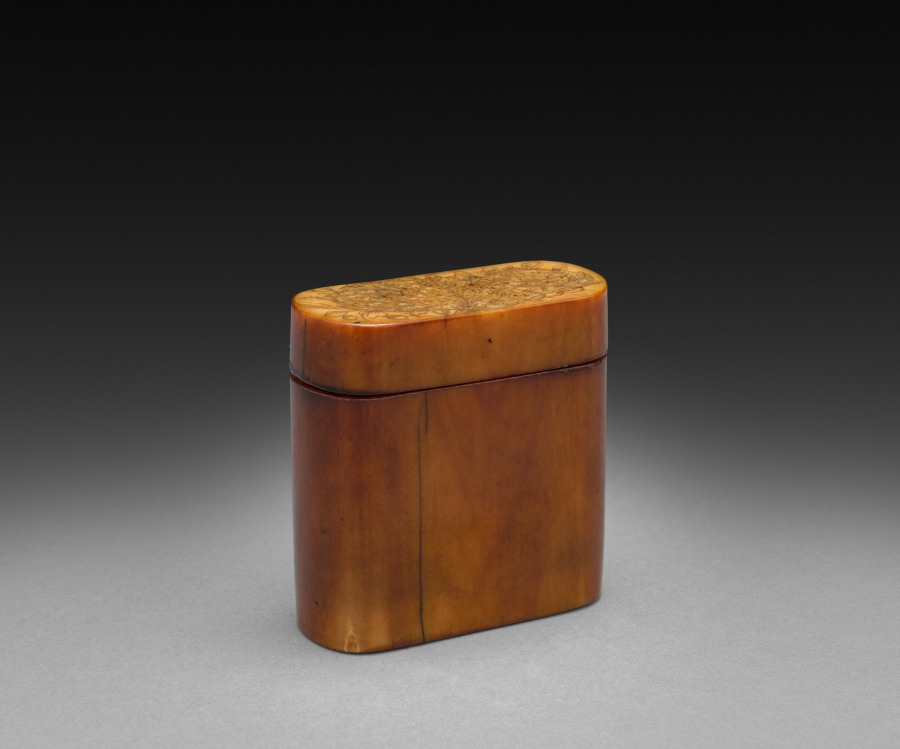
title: Box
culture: China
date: early 1900s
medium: ivory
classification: Ivory